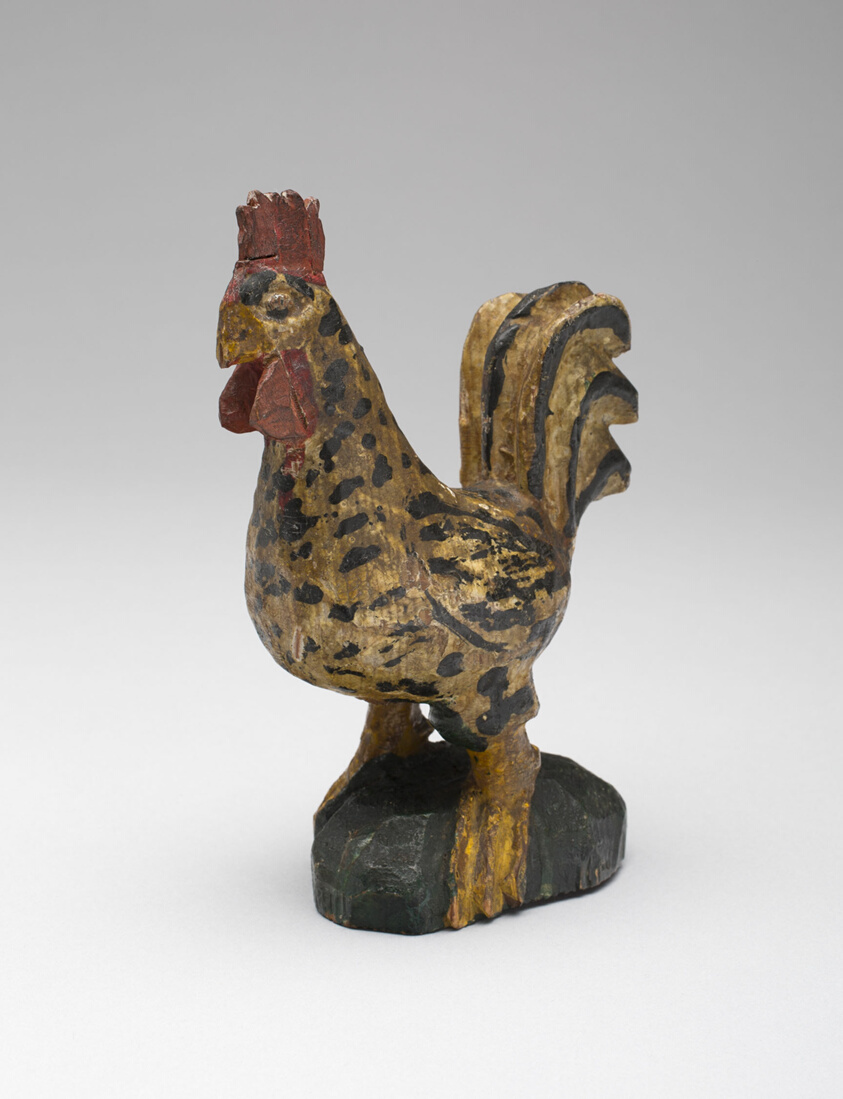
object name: Decorative Arts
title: Rooster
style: Folk Art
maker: Wilhelm Schimmel; American, born Germany, 1817–1890; Cumberland County, Pennsylvania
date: 1870–90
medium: Wood and paint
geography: Pennsylvania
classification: sculpture; american decorative arts; american arts; decorative arts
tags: animals